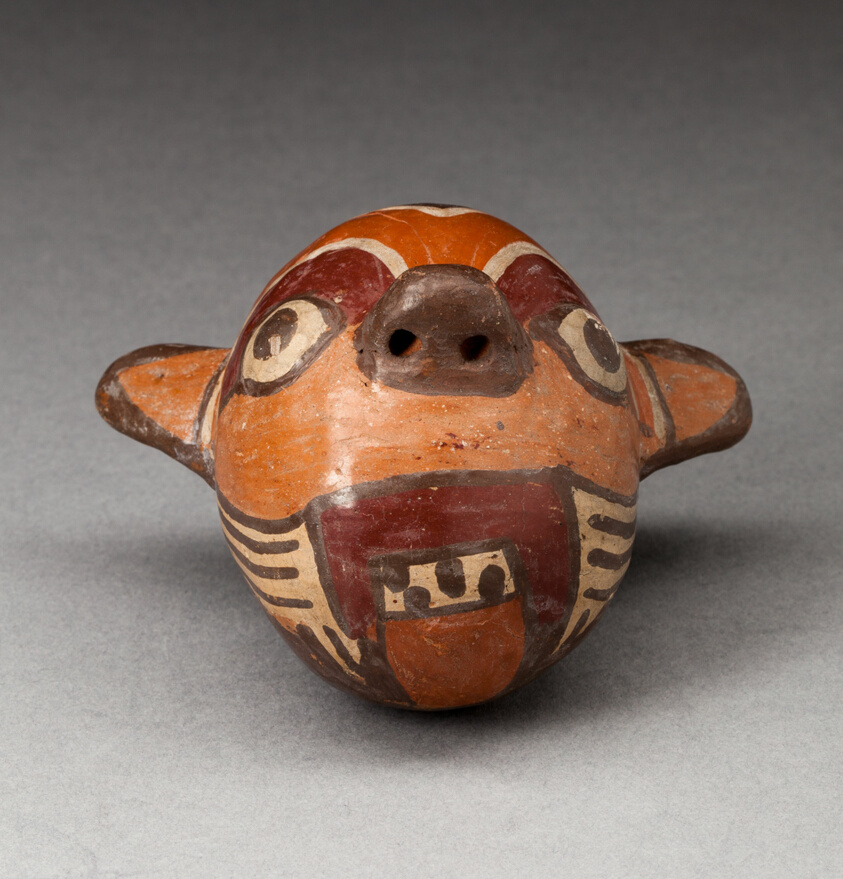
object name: Vessel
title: Miniature Vessel in the Form of a Feline Head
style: nazca, Arts of the Americas, andes, south american, andean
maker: Nazca; South coast, Peru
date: 180 BCE–500 CE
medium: Ceramic and pigment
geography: Peru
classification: earthenware; art of the americas; ceramics; vessel